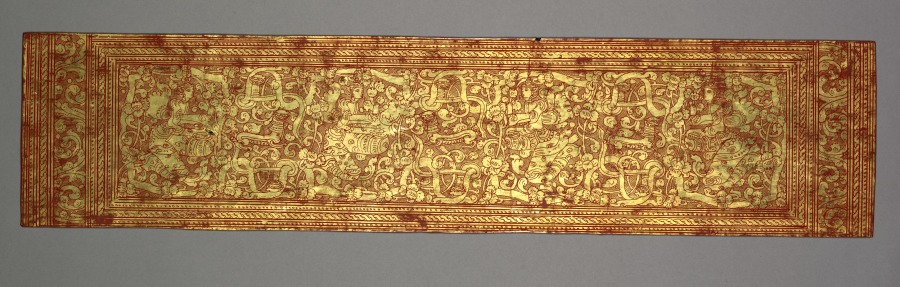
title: Kammavacha: Buddhist Ordination Text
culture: Myanmar (Burma)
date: 1800s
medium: Cover: lacquer, gilding, and glass appliqué on wood; leaves: lacquer and gilding on cloth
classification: Manuscript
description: In premodern Burma, lay people commissioned lavishly ornamented manuscripts for ceremonial occasions, when officiants would read aloud from the text. Written in black lacquer, the text is in the language of Pali written in a Burmese script. It contains ordination rites and procedures for monastic ceremonies. The second to last page is covered with intricately drawn, winged celestial beings (nats) in gestures of praise. They fly amid intertwining vegetation—denoting bounty—that grows from serpentine forms that refer to rain clouds. Lionlike forms inhabit the space with them. The top and bottom covers are equally ornamented with jeweled floral patterning.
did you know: The Pali text of this manuscript is written in Burmese square script, which is also known as "tamarind seed script."